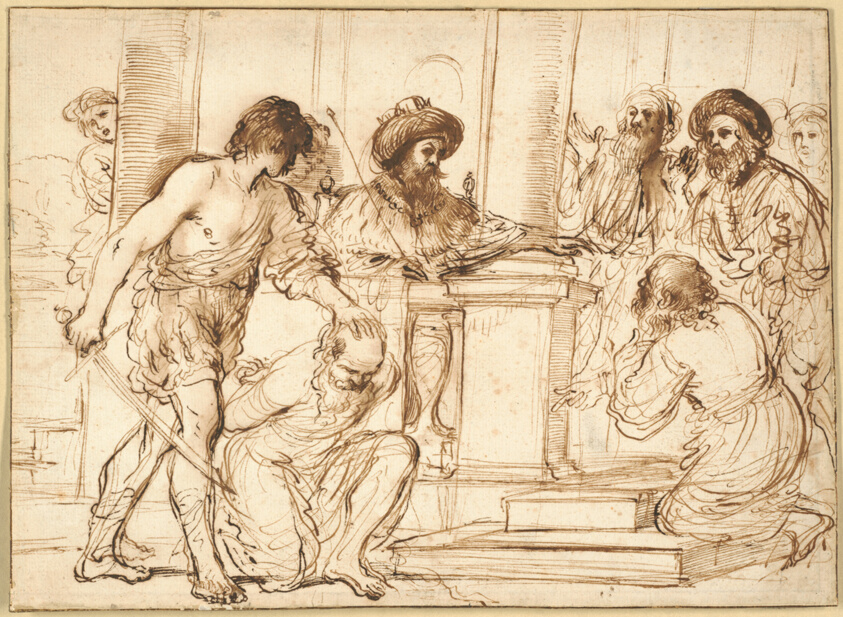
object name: Drawing and Watercolor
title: Damon and Pythias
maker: Giovanni Francesco Barbieri, called Il Guercino; Cento 1591–1666 Bologna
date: 1632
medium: Pen and brown ink, with brush and light brown wash, on ivory laid paper, laid down on cream laid paper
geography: Italy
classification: pen and ink drawings; prints and drawing; paper